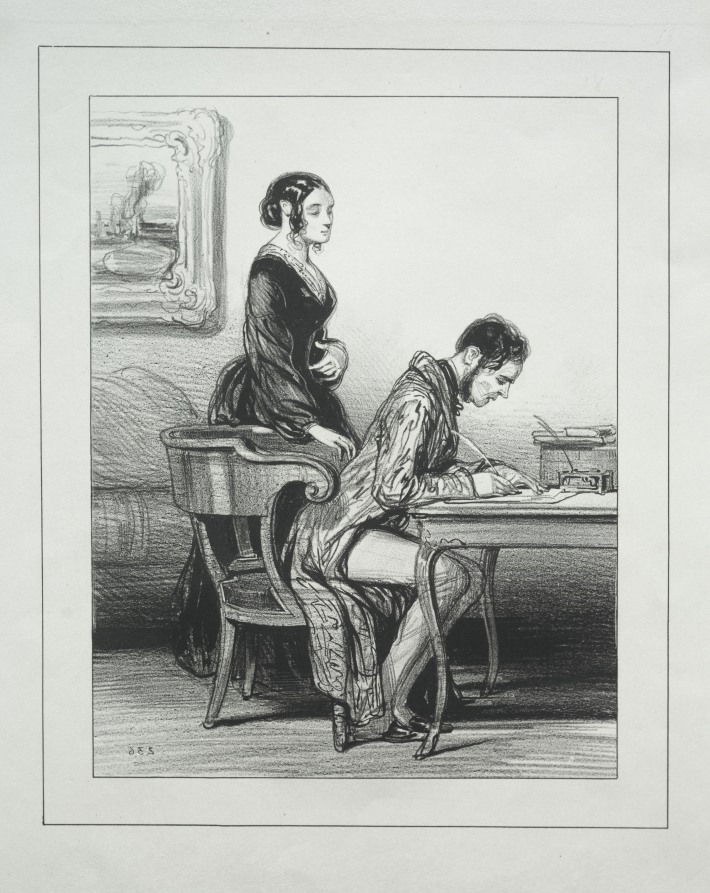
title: Fourberies de Femmes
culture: France, 19th century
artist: Paul Gavarni (French, 1804–1866)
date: c. 1836–41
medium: lithograph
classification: Print